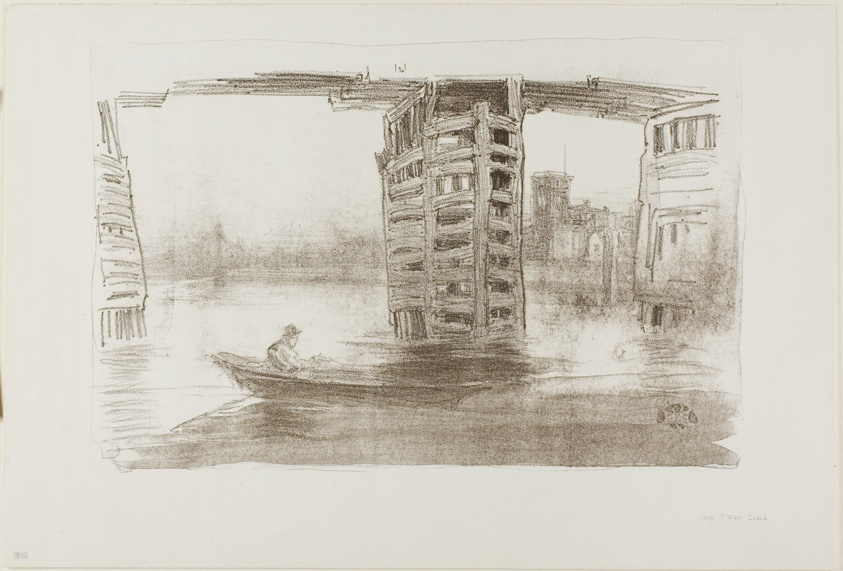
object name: Print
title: The Broad Bridge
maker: James McNeill Whistler (American, 1834-1903)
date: 1878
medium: Lithotint in brown ink, with scraping, on ivory plate paper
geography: United States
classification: lithotint; lithograph; print; prints and drawing; paper